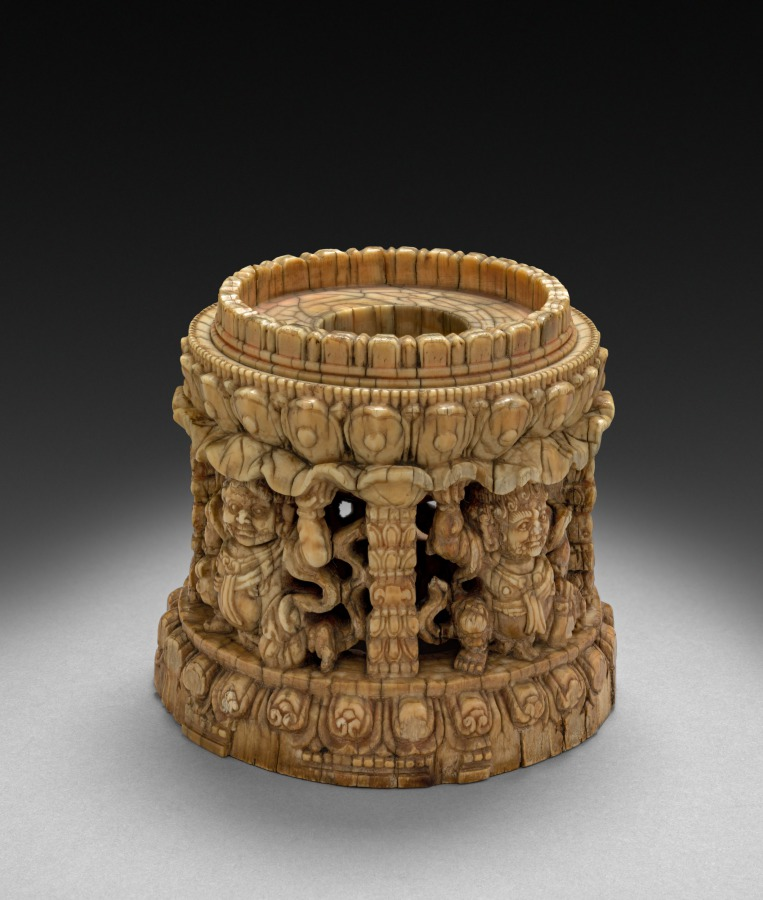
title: Pedestal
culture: China, Tang dynasty (618-907)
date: mid-700s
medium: ivory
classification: Sculpture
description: Small circular pedestal or stand for an icon or figure, most probably a Buddha. Starting from the base of the pedestal, there is a band of pearling or beading, a row of everted lotus petals, four dwarf-like creatures alternating with four square columns, a lotus leaf, another row of lotus petals, their stamens and anthers, and finally a row of alternating large and small elements retaining traces of a red stain and probably representing stylized lotus petals. The pedestal is in the form of a well-known type, the double lotus pedestal (visvapadma), which was particularly popular in the second half of the sixth century, being found in most of the Chinese cave sites of that period. This pedestal however, represents a later continuation of the type.